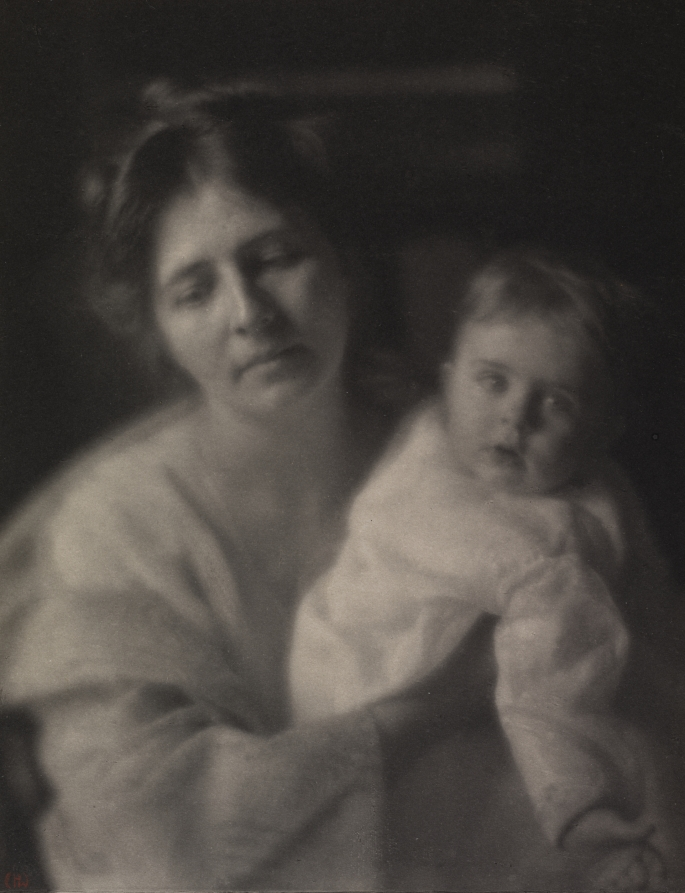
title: Julia McCune Flory and Phoebe Flory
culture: America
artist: Clarence H. White (American, 1871–1925)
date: 1915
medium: platinum print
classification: Photograph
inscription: Written in red ink on recto of photo: "CHW"; in pencil on recto of original mount: "Clarence H. White, [signed] 15"; written in pencil on verso: "3 [circled]"